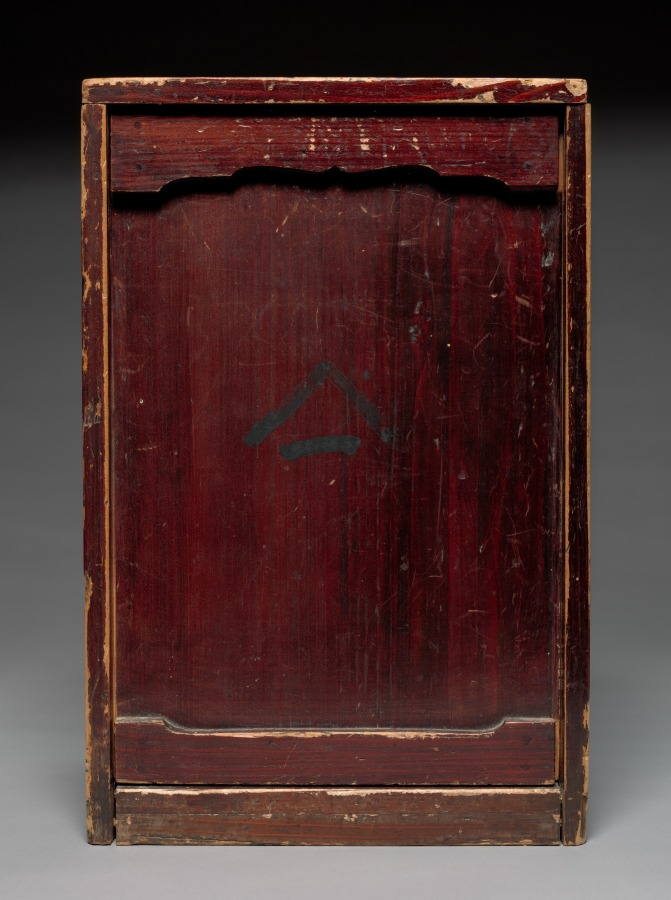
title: Tea Whisk-Shaped Sake Bottle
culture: Japan, Edo period (1615–1868)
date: 1660s–early 1670s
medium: Porcelain with overglaze enamel (Hizen ware, early iro-e)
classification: Ceramic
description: This sake bottle resembles a whisk used in preparing powdered green tea, with the handle at the top and the body of the brush flaring out below. Its bold design is anchored by images of chrysanthemums and pomegranates set in panels against a ground of red hatching with tricolored clouds. Additional patterns of swirls, stripes, flowers, and other forms make the piece dazzling.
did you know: This bottle is for sake, or fermented rice wine, Japan's most famous variety of local alcohol.